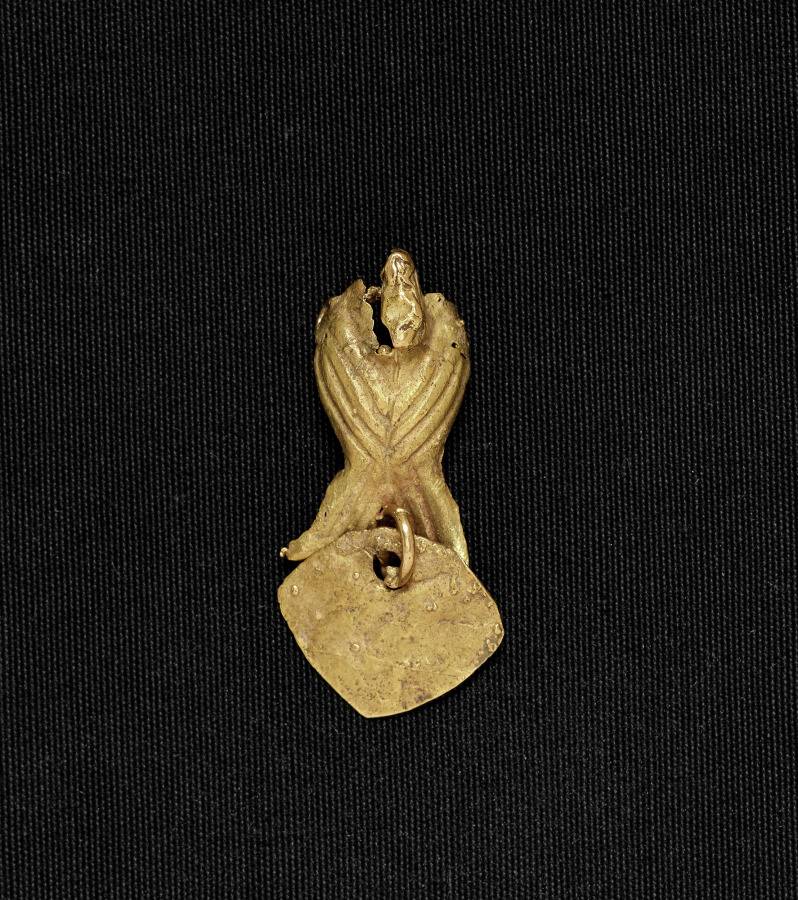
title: Bird Bead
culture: Colombia, Muisca style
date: c. 900–1550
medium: cast gold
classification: Jewelry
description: Muisca metalwork divides into two categories: ornaments to be worn, such as these, and offering figurines, in the case to the right. The elaborate bird pendant features delicate herringbone moldings, openwork patterns, and wing details-all part of the wax model from which the pendant was cast (see nearby computer animation). The dangles were attached after casting.